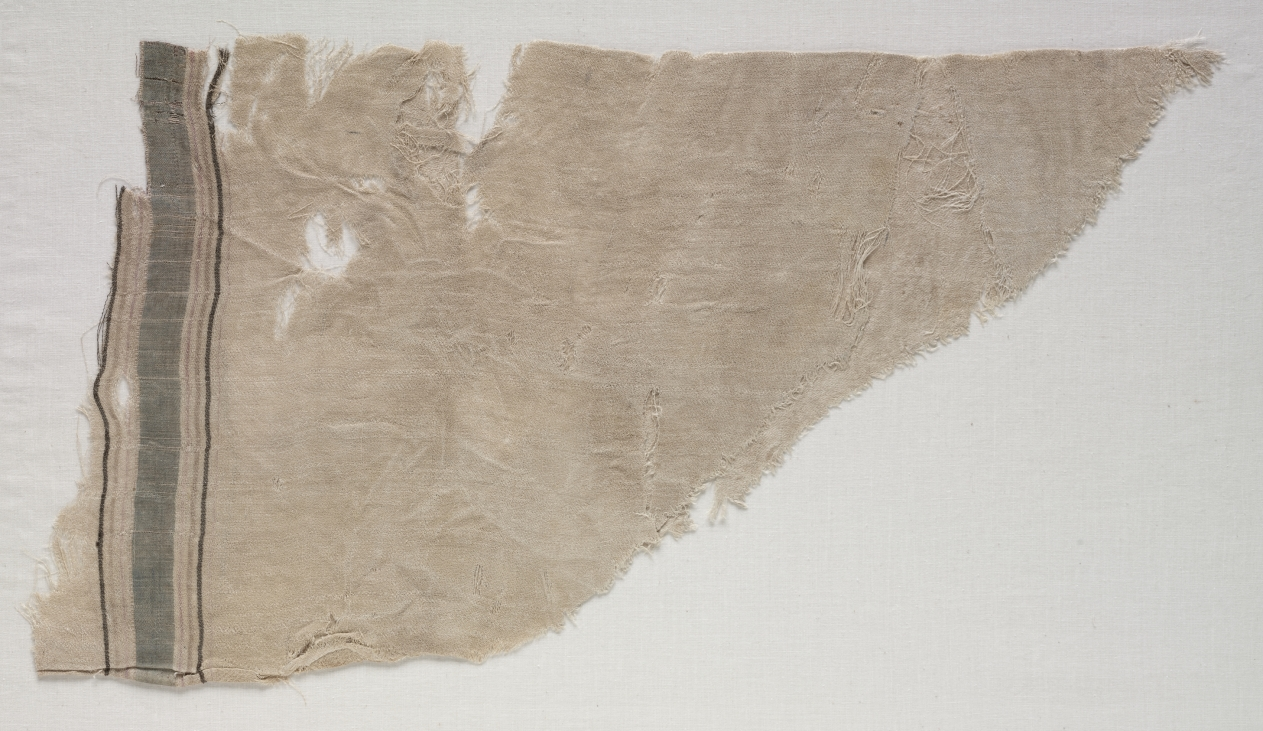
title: Fragment from a Garment: Sleeve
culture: Iran or Iraq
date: 1900s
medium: Silk: lampas weave, brocaded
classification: Textile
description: This fragment was a portion of a sleeve. The fabric appears to have faded from its original pink color.